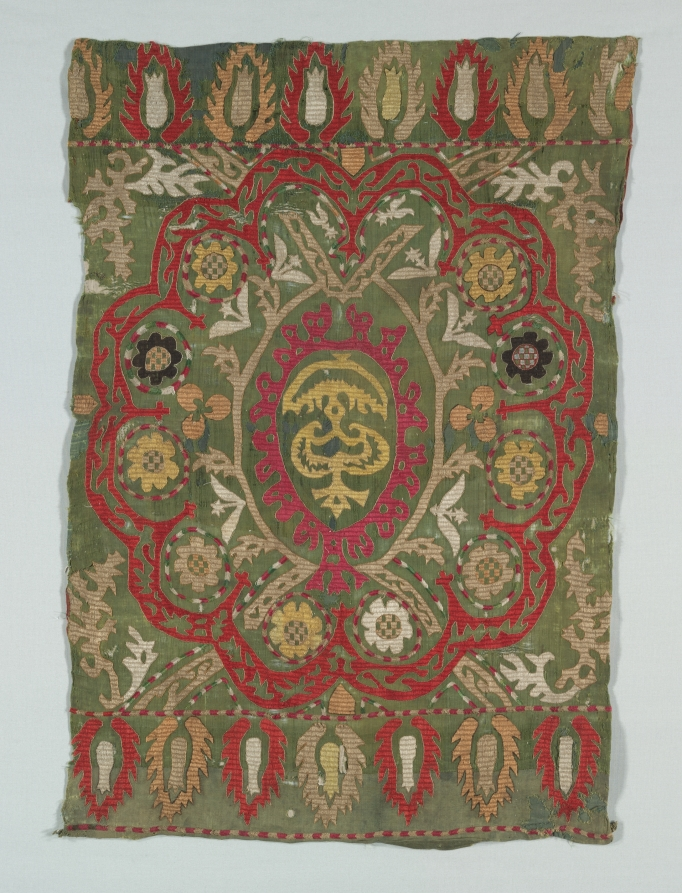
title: Cushion Cover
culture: Dagestan, 18th century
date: 1700s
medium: embroidery, silk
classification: Embroidery